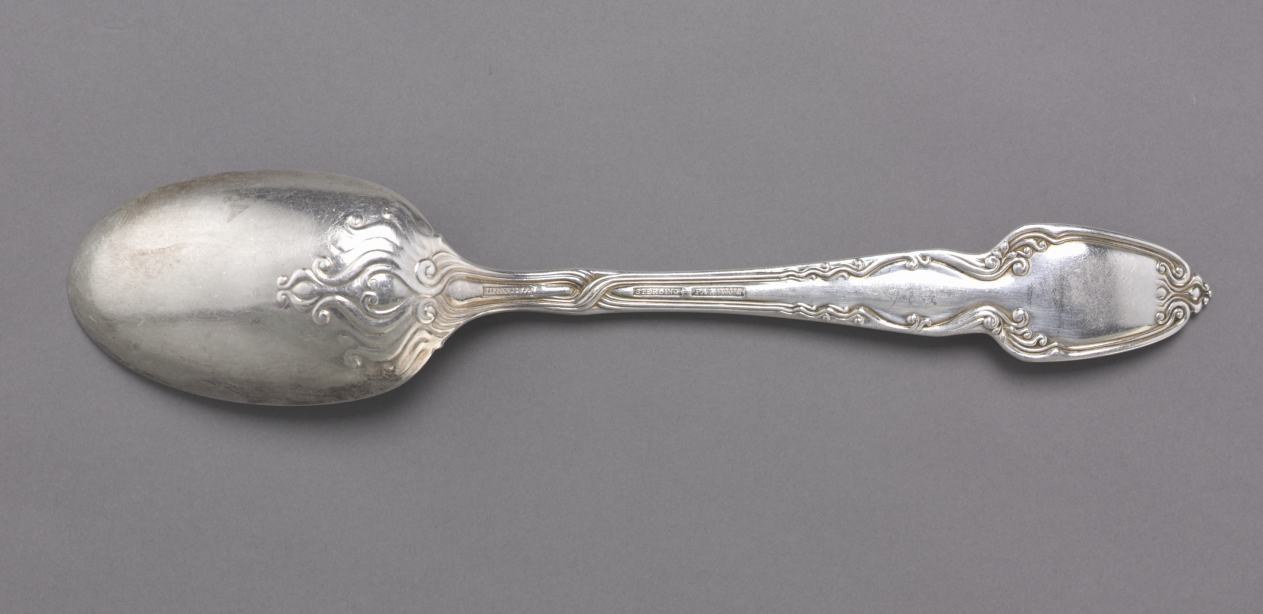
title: Table Spoon (Pattern "Broom Corn")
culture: America, New York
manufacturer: Tiffany & Co. (America, New York, est. 1837)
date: c. 1890–1900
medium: Silver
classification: Silver